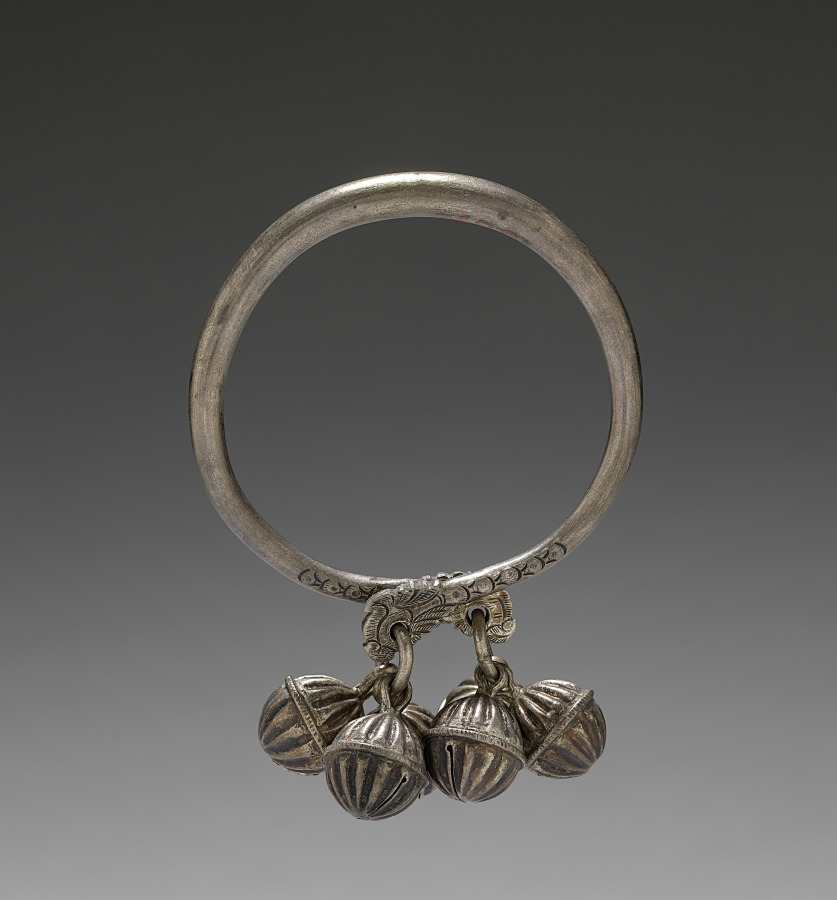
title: Bracelet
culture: India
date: 1800s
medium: silver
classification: Jewelry